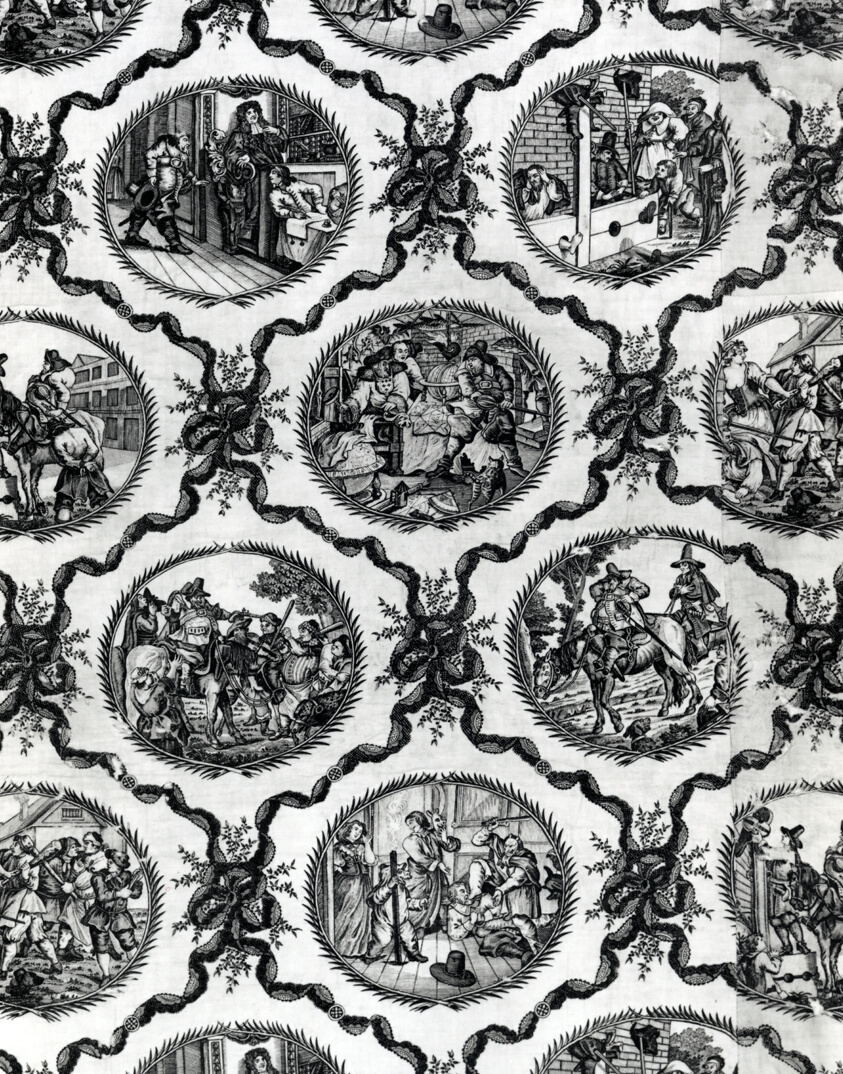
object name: Textile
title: Bedcover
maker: Engraved by William Hogarth (English, 1697–1764) after illustrations by Samuel Butler (English, 1612–1680); England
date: 1780s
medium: Cotton, plain weave; copperplate printed; edged and backed with cotton, plain weave; quilted; two and a half panels joined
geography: England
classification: textile; weaving - printed